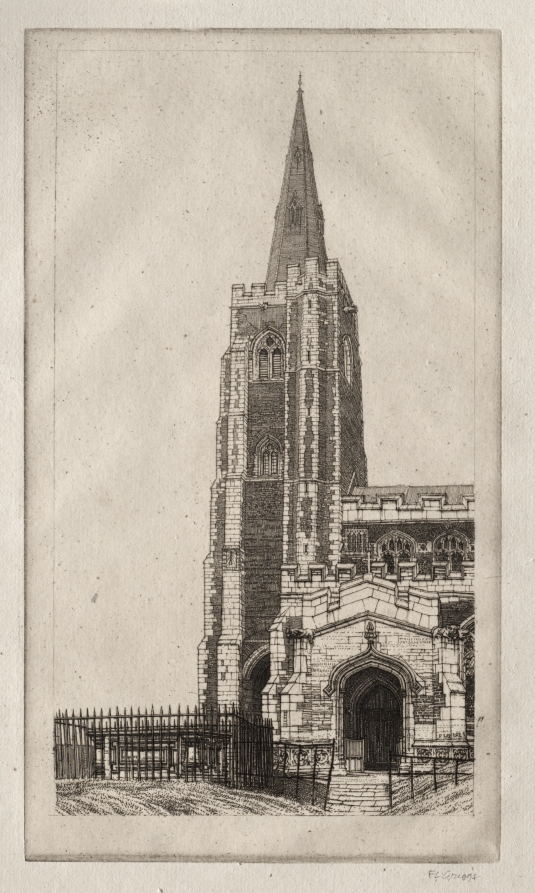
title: St. Wendred's, March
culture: England, 20th century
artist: Frederick Landseer Maur Griggs (British, 1876–1938)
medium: etching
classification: Print